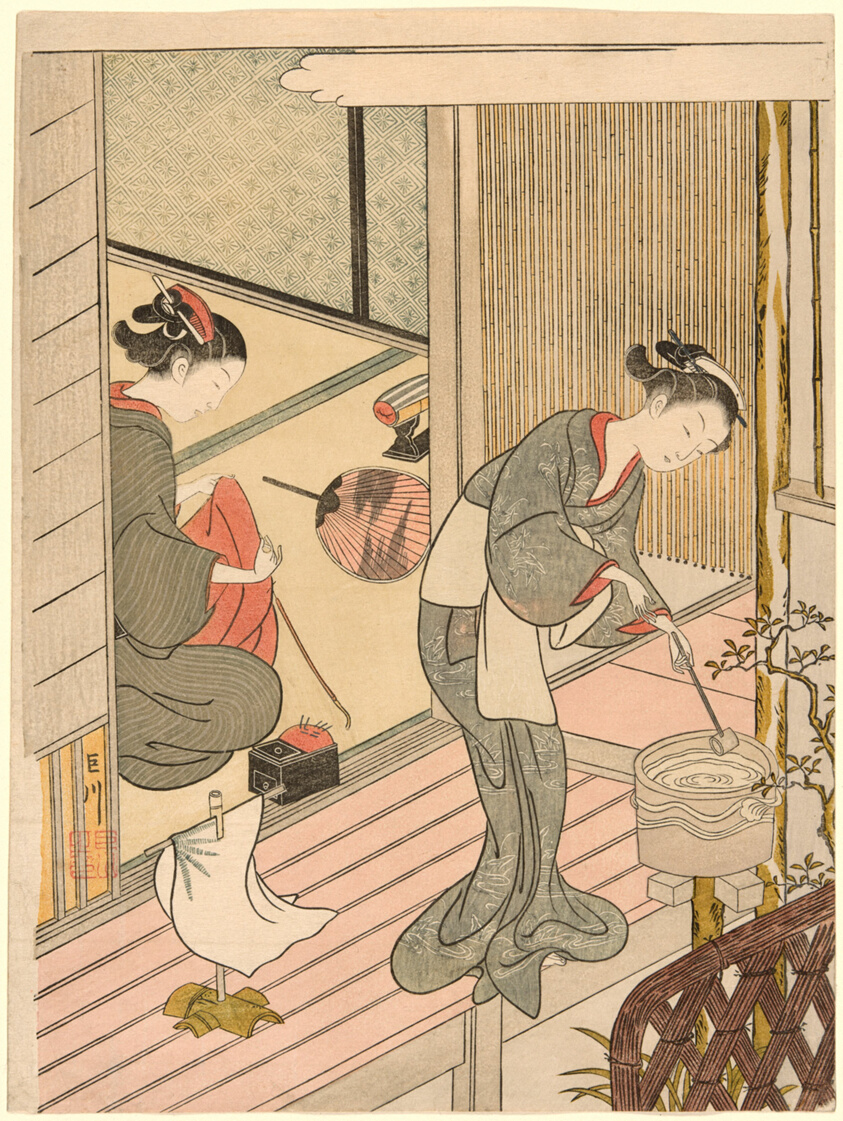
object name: Print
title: Returning Sails of the Towel Rack (Tenugui-kake no kihan), from the series "Eight Views of the Parlor (Zashiki hakkei)"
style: Japanese (culture or style)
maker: Suzuki Harunobu 鈴木 春信; Japanese, 1725 (?)-1770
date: c. 1766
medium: Color woodblock print; chuban, surimono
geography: Japan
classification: woodblock print; print; asian art